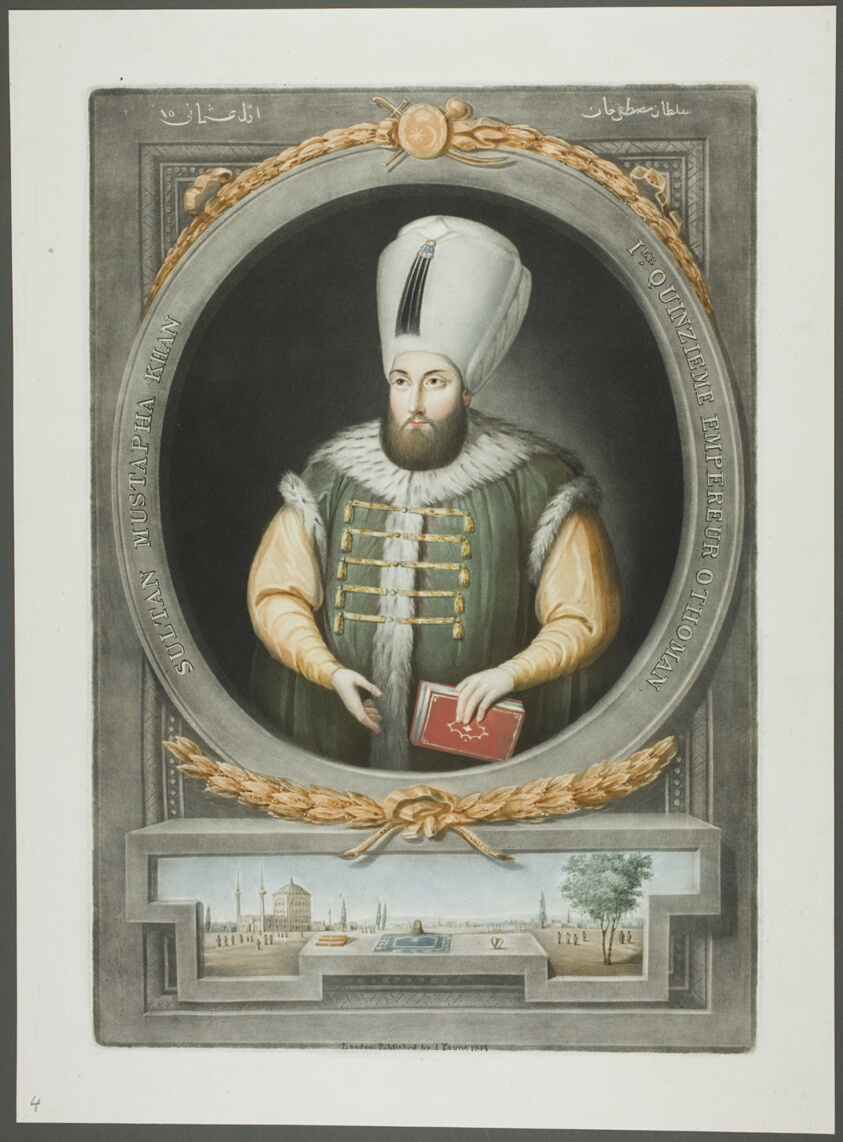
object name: Print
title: Mustapha Kahn, from Portraits of the Emperors of Turkey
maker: John Young (English, 1755-1825)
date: 1815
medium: Mezzotint, hand-colored with brush and watercolor, on ivory wove paper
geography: England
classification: mezzotint; print; prints and drawing